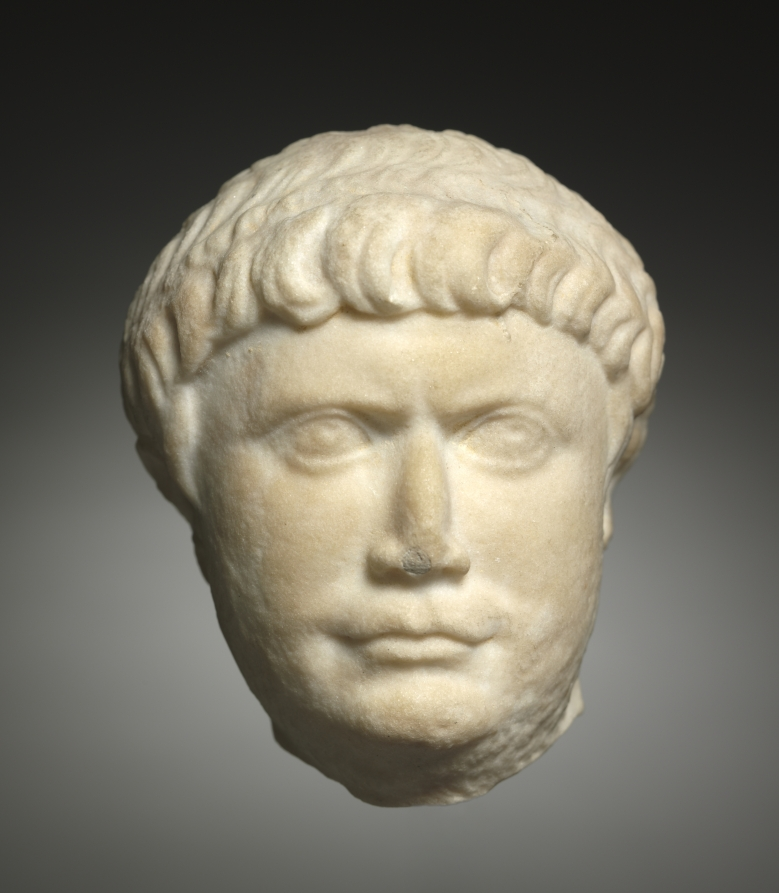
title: Head of Trajan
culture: Italy, Roman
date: 100–200 CE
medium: marble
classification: Sculpture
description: Though this portrait head has many of the features associated with the emperor Trajan, such as his short, comma-shaped forelocks, other aspects of the statue are unusual. For example, all other known portraits of Trajan depict him as clean shaven, but this one appears to have facial hair. Provincial portraits—that is, those made outside of Italy—could sometimes differ dramatically from imperial standards. This head may be an example of provincial experimentation.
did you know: Drilled pupils only began appearing on Roman portrait statues after Trajan’s death in 117 CE; their appearance here could be a later addition.